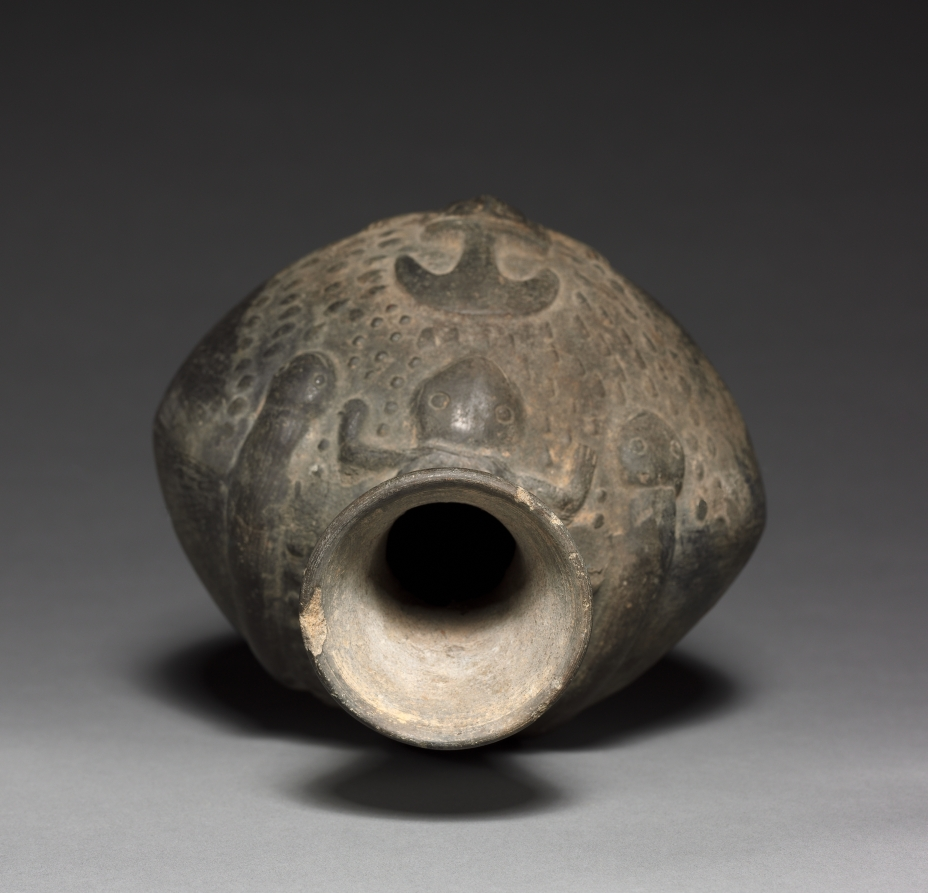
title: Bottle with Figure in Relief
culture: Peru, probably Chiclaya, Chimú, 13th-15th century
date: 1200s-1400s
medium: black ware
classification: Ceramic